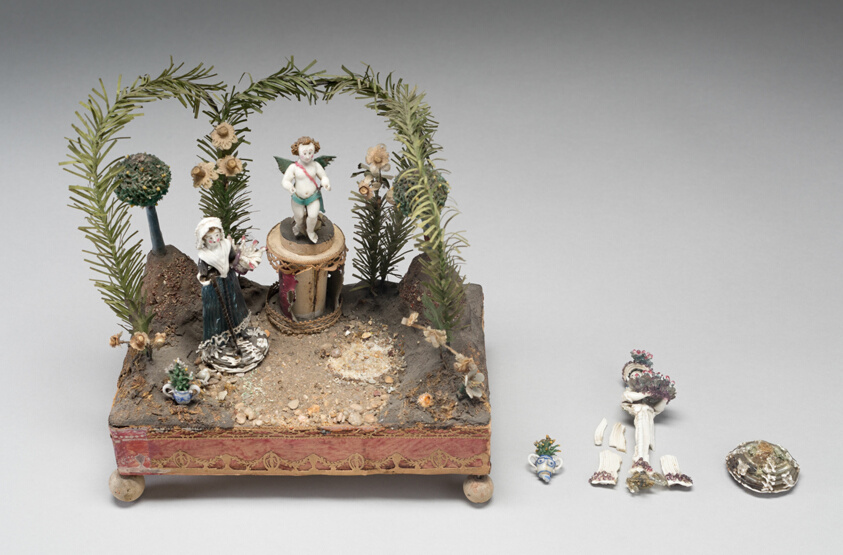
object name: Glass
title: The Shrine of Love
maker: Nevers, France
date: 18th century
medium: Glass; lampwork (verre de Nevers), metal armature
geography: France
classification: glass; miniature; decorative object/ornament; european decorative arts